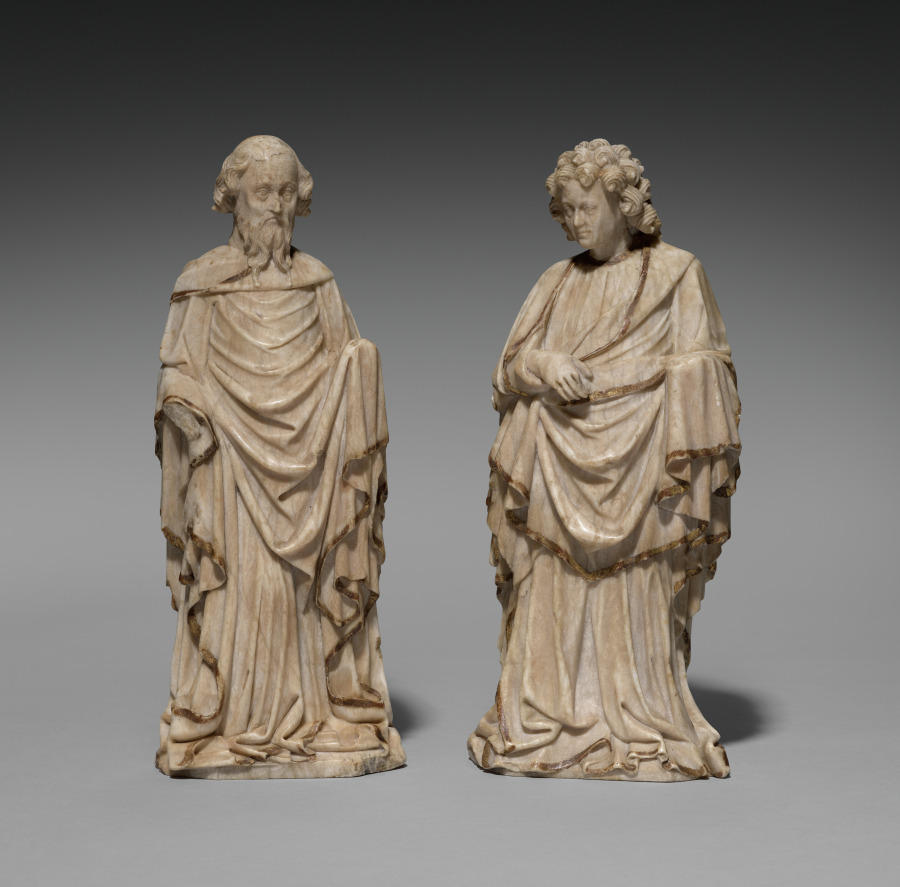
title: Two Standing Apostles (probably Saint John the Evangelist and St. Paul)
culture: Southern Netherlands or Northern France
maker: Master of the Saint-Omer Apostles (Southern Netherlandish, active Bruges?)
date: c. 1430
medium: Alabaster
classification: Sculpture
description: The two sculptures come from an altarpiece in the cathedral of Saint Omer in northern France. Four other figures have been preserved there, and possibly one at the Metropolitan Museum in New York. The workshop was probably located in Bruges, in what is now Belgium. Sculpture was the leading art genre at that time. The specialized workshops obtained the stone alabaster from distant quarries, in this case from the area of Würzburg in Bavaria (Germany), to form it intricately and deliver it to customers in almost all of Europe.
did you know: Alabaster is very soft; after 20 minutes of treatment with water the surface will dissolve.